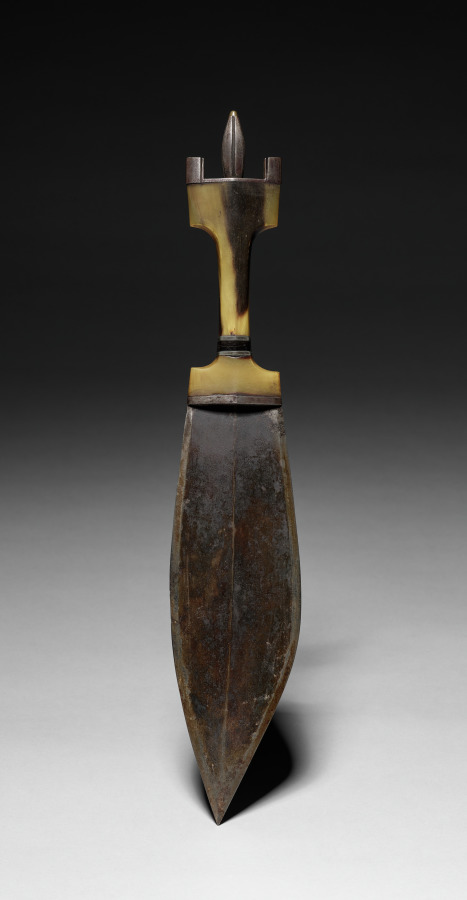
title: Knife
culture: Africa, unknown maker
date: 1800s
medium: steel with horn handle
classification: Arms and Armor